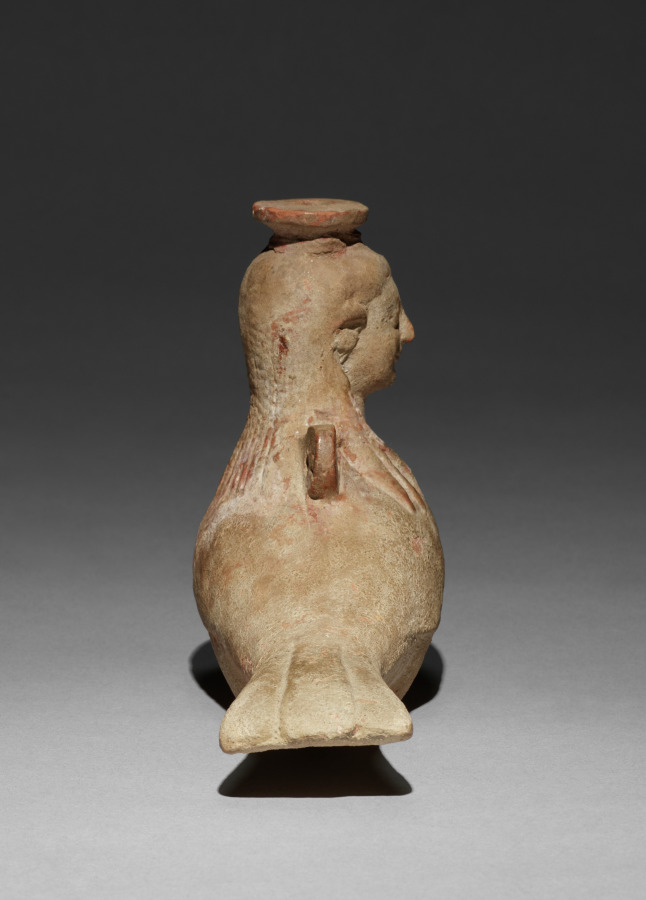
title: Siren-Shaped Perfume Flask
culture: Greece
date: 600–480 BCE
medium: terracotta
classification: Sculpture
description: A half-bird, half-woman creature, a siren lured sailors to death by the sweetness of her song. The most famous sirens appear in the ancient epic the Odyssey. Shaped like a siren, this vessel likely held valuable perfumed oil. Its small mouth limited spillage, and a string attached to the loops on its back allowed it to hand or hold a stopper.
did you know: In the Odyssey, Odysseus’s crew escapes the sirens by plugging their ears with wax.